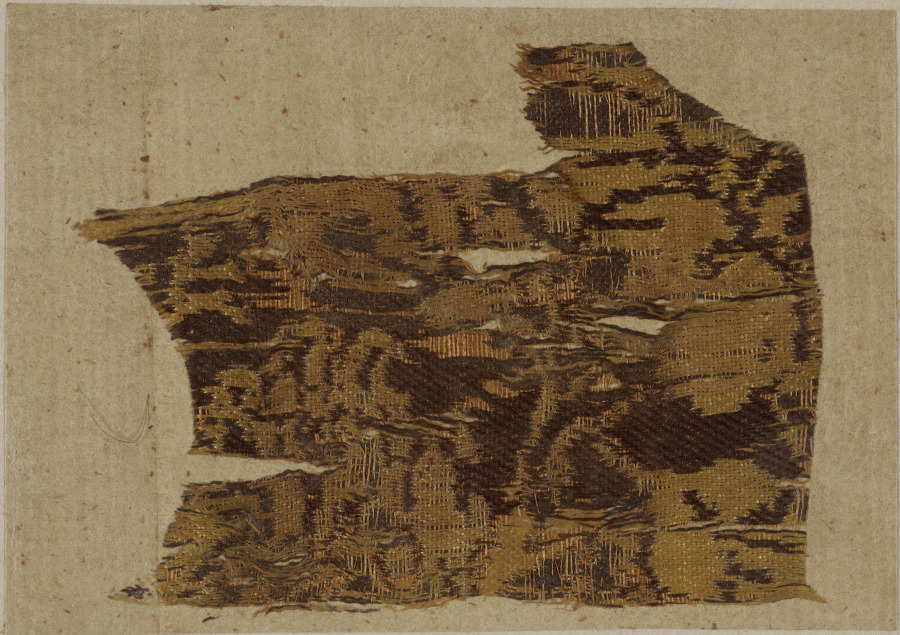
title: Fragment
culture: China, 8th century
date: 700s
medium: compound twill, silk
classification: Textile